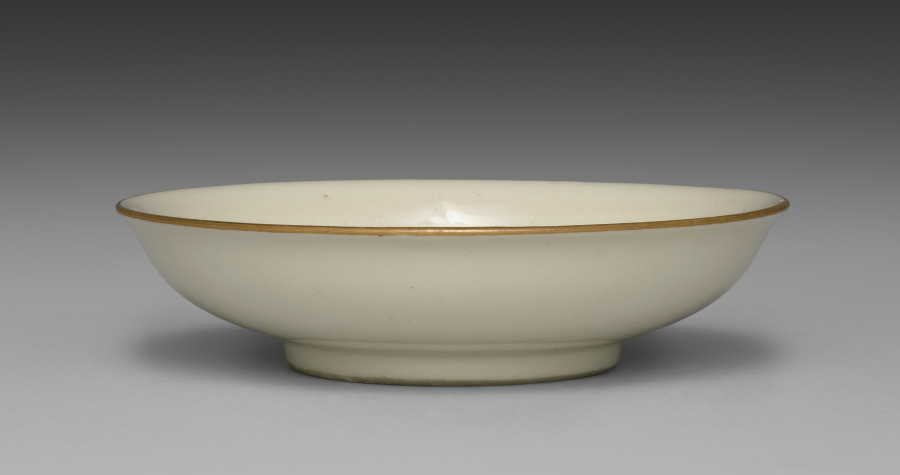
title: Small Dish from Dining Set with Plum Blossoms and Cracked-Ice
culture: Japan, Meiji period (1868–1912)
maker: Seifū Yohei II (Japanese, 1844–1878)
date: c. 1875–78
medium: Porcelain with molded designs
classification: Ceramic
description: Each item in this set has a delicate low-relief design of flowering plum branches over scattered, intersecting lines meant to resemble the cracked-ice surface of a frozen body of water and is signed on the base in gold pigment. While Yohei II produced many fine works in underglaze blue, like those produced by Kiyomizu Shichibei, he also made works in quite different styles later in his career, from the early 1870 s. In 1873, he was appointed purveyor to the Industrial Center of Kyoto Prefecture, a designation associated with Kyoto’s efforts to reach an international market through the port of Kobe; and from 1875 until his death, he was involved in national-level projects to present Japanese ceramics across the world. It was during this period that Yohei III was apprenticed to Yohei II, and it has been suggested that this set may in fact be an early example of Yohei III’s work, which he signed with his teacher’s name. Decorated with flowers resembling Japanese textile motifs, the set calls to mind the design of Yohei II’s pair of vases with plum blossoms in the Victoria and Albert Museum. Here, the elaborate trees created for a formal public exhibition setting have been translated into the approachable blossoms of the genteel domestic environment. While the designs are consistent across the pieces, each raised flower petal and pistil and each incised line in the ice was done by hand, so the cups, bowls, and dishes are similar yet unique. The bottoms of two boxes once identified the set’s owner, but the information has been deliberately obscured with black ink. However, inscriptions still visible appear to indicate two occasions, once at the end of July 1886 , and once again in June 1916 , when parts of the set were requested from Hokura in Niigata Prefecture. The location corresponds to a neighborhood in the present-day city of Jōetsu. The surname Tsuji 辻 also appears on a paper tag affixed to one of the box cloths. Future research may possibly reveal more about their provenance. A vase by Yohei III in a private collection combines the formal grandeur of the Yohei II vases in the Victoria and Albert Museum with the gentler design of this dining set, placing flowering plum trees against soft, scalloped-edge clouds resembling those in golden screens.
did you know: The dining wares have a creamy white coloration that the four boxes containing them identify as Korean in style.